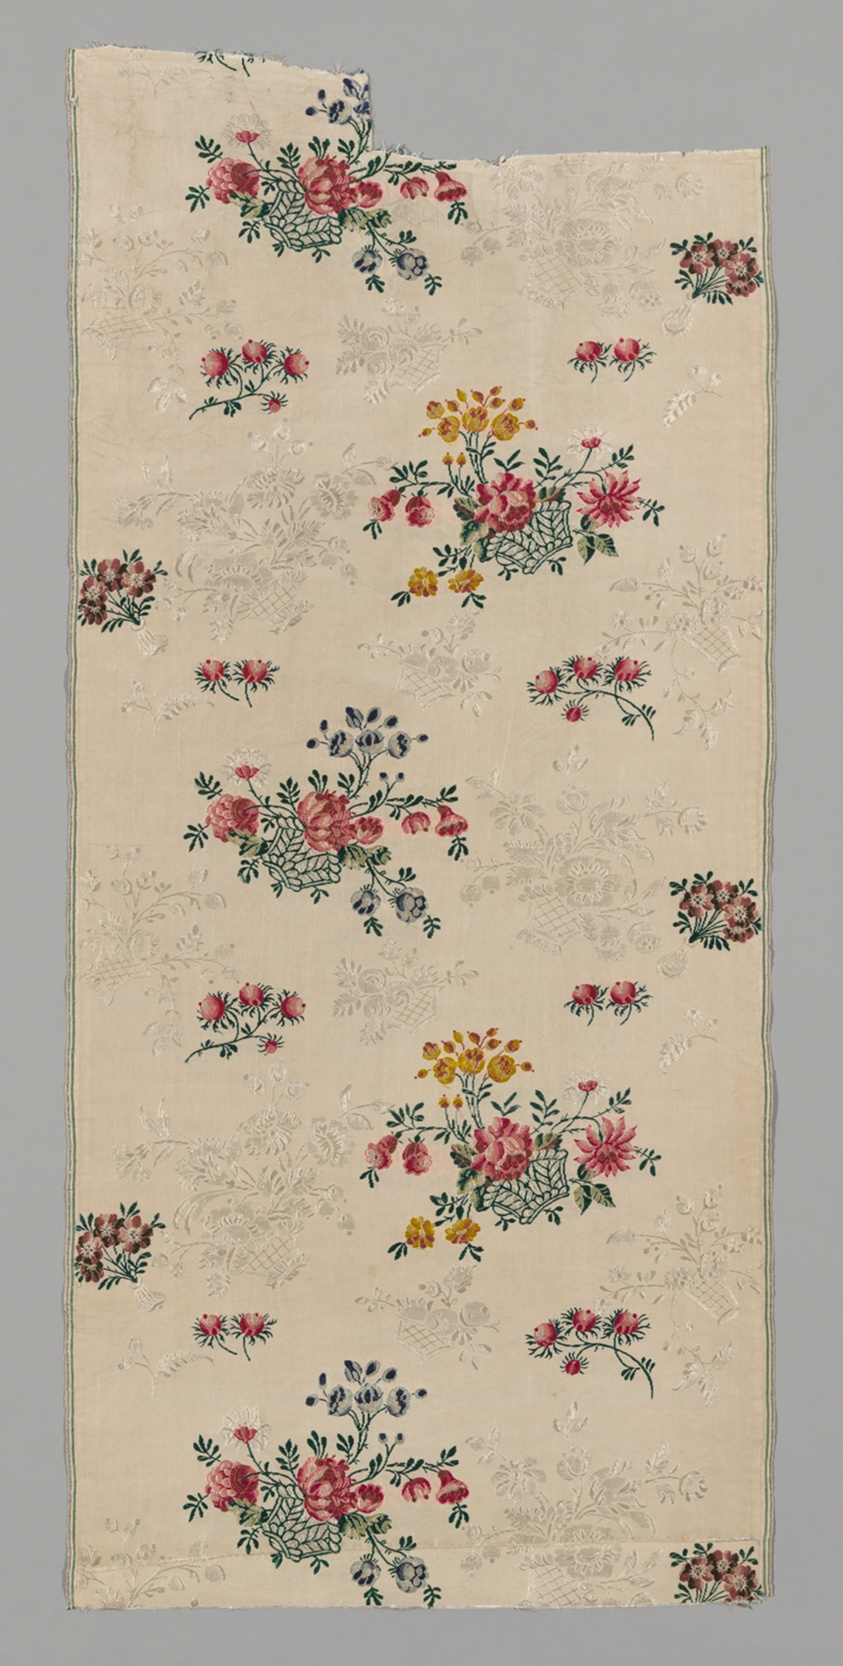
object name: Textile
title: Panel (From a Dress)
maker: England, Spitalfields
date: c. 1745/46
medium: Silk, plain weave with patterning and brocading wefts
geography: England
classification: textile; weaving